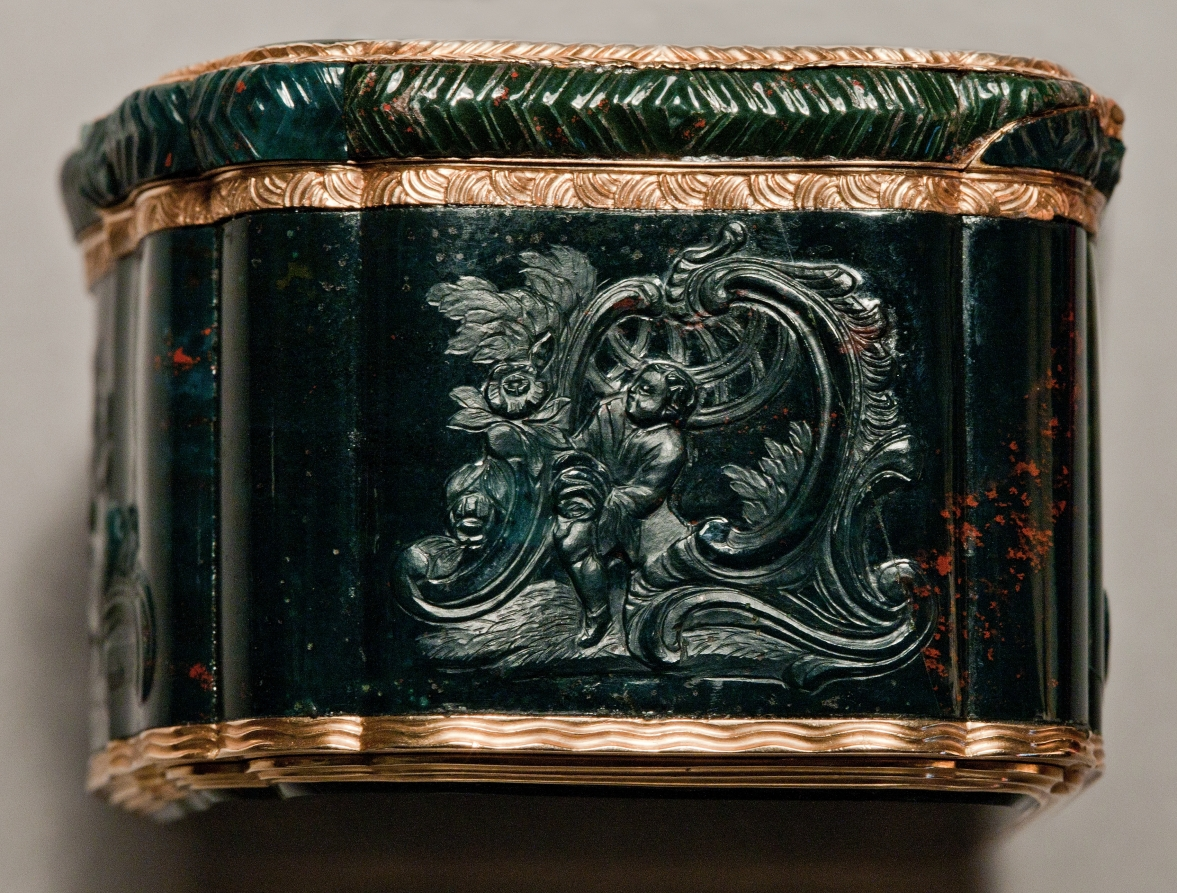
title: Snuff Box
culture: Germany, Berlin, mid-18th century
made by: attributed to Johannes George Klette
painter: Carl Gustav Klingstedt (Swedish, 1657–1734)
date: c. 1750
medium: gold-mounted carved bloodstone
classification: Miscellaneous